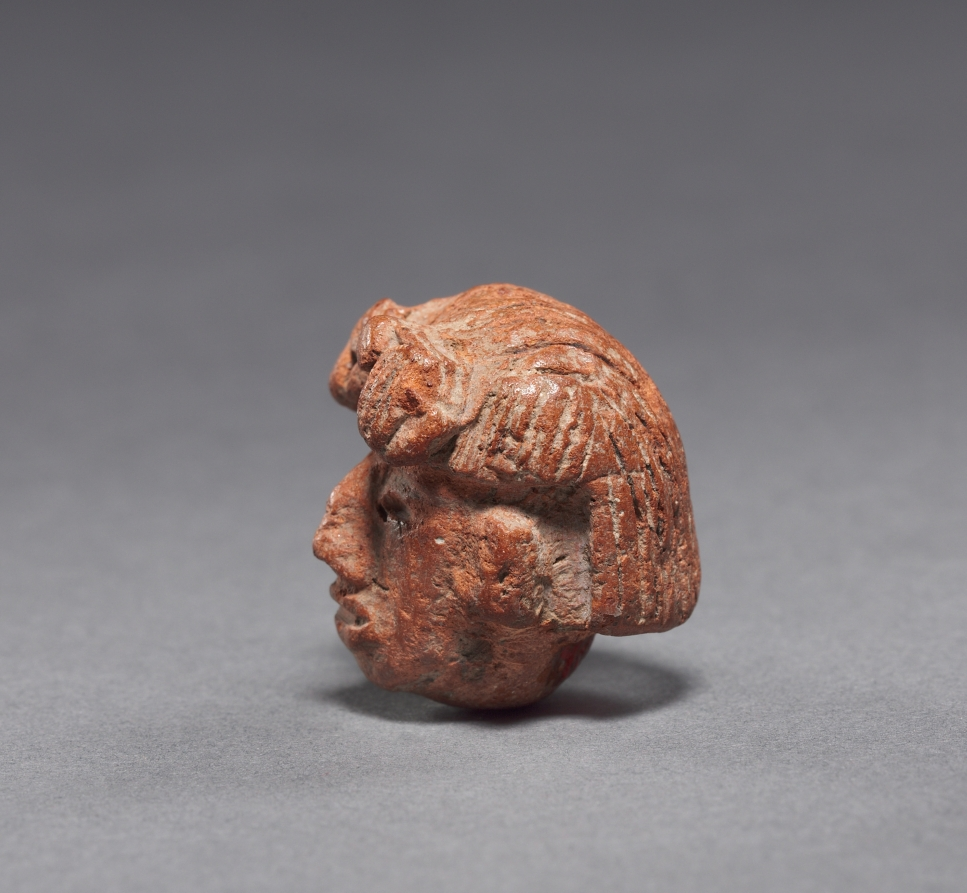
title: Head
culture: Mesoamerica, Pre-Columbian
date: before 1519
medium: clay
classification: Sculpture